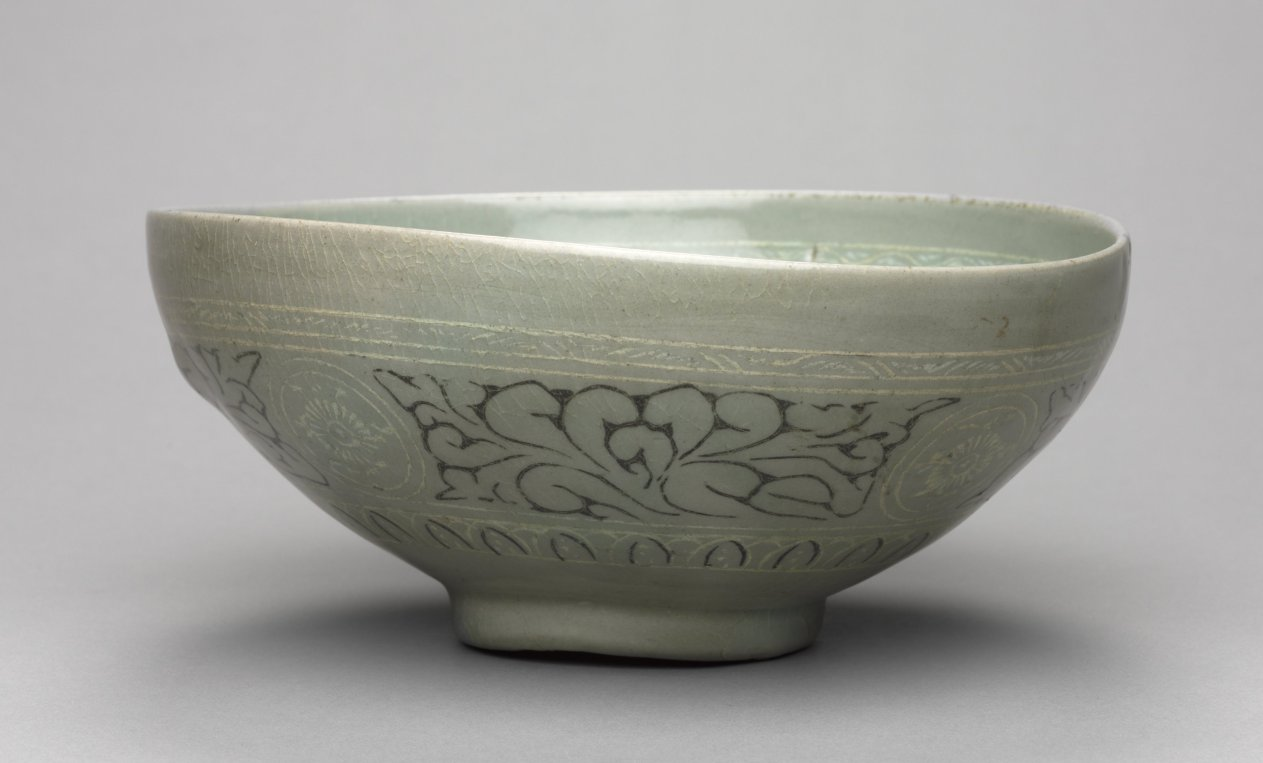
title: Bowl with Inlaid Chrysanthemum and Lychee Design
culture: Korea, Goryeo dynasty (918–1392)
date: 1300s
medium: pottery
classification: Ceramic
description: As early as the seventh century, the practice of drinking tea and wine became an important part of elite leisure culture in Korea. A wide bowl like this example was especially suitable for drinking powdered tea shaved from a compressed tea cake, the most commonly enjoyed type during the Goryeo period. The outer wall is lavishly decorated with the inlaid image of flowering vines, the inner wall with the inlaid image of chrysanthemum and lychee. Such elaborate design tells us that tea wares then were aesthetically invested objects of luxury.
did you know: Kangjin and Buan kilns in Jeolla province were the two major production centers for celadon wares during the Goryeo period (918-1392).